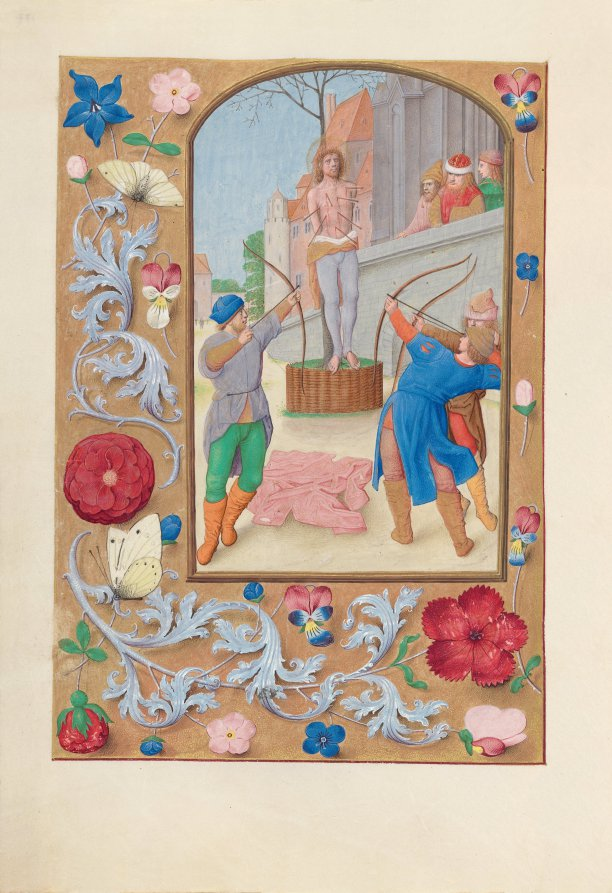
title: Hours of Queen Isabella the Catholic, Queen of Spain: Fol. 177v, St. Sebastian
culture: Flanders, Ghent and Bruges, late 15th century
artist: Master of the First Prayerbook of Maximillian (Flemish, c. 1444–1519)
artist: and Associates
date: c. 1500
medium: ink, tempera, and gold on vellum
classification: Bound Volume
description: This manuscript was illuminated by a circle of at least five highly organized manuscript painters active in the Flemish cities of Ghent and Bruges. The principal illuminator was Alexander Bening, who painted the majority of the book's miniatures. Manuscripts produced by this circle of artists are renowned for the decoration of their borders, which typically feature a rich variety of realistically-painted flowers, birds, and butterflies. This prayer book, called a book of hours, was intended not for a cleric, but for the private devotions of a lay person-in this case, Isabella the Catholic, Queen of Spain (1451-1504). Isabella's coat of arms embellishes the book's frontispiece. It is unlikely that the book was commissioned by the Queen herself; rather, she probably received it as a diplomatic gift from someone courting her patronage, perhaps Cardinal Francisco Jimenez de Cisneros. A Franciscan friar, Jimenez was dependent upon Isabella for his advancement, first to the post of Queen's confessor in 1492, and then to Archbishop of Toledo in 1495.